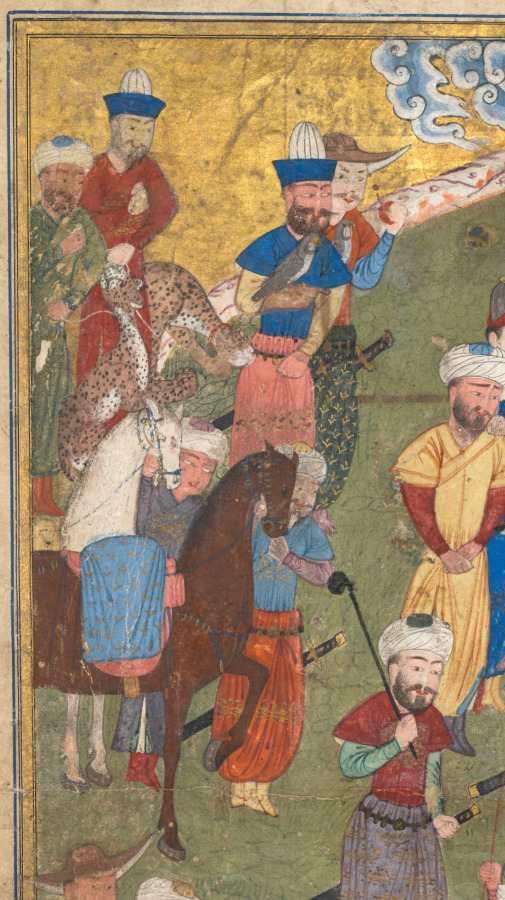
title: Royal Reception in a Landscape, left folio from the double frontispiece of a Shahnama (Book of Kings) of Firdausi (Persian, about 940–1019 or 1025)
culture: Iran, Shiraz, Timurid period (1370-1501)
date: 1444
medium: Opaque watercolor, ink, gold, and silver on paper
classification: Manuscript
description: The royal feast is set in a green landscape dotted with flowers and blossoming bushes against a gold sky with wisps of blue and white clouds. The group of figures in the upper left includes a falconer, horses, attendants, and two hunting cheetahs, while servers transport food and drink in gold and ceramic vessels, some presumably Chinese blue and white porcelain. Possibly this banquet was offered after a courtly hunt, a prestigious symbol of power and wealth. Among the groups of men sitting on elaborate carpets are three Chinese officials, identifiable by their black hats, kneeling together on the ground. Although their presence indicates the presence of foreign cultures within the Timurid court, the painting also reveals that not all are welcome to the feast; in the bottom half of the page a guard wields a stick to drive a group of men out of the garden.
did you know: The painting on this folio is the first half of a double-page frontispiece now detached from a Shahnama (Book of Kings) manuscript. CMA 1956.10 is the left half of the frontispiece.